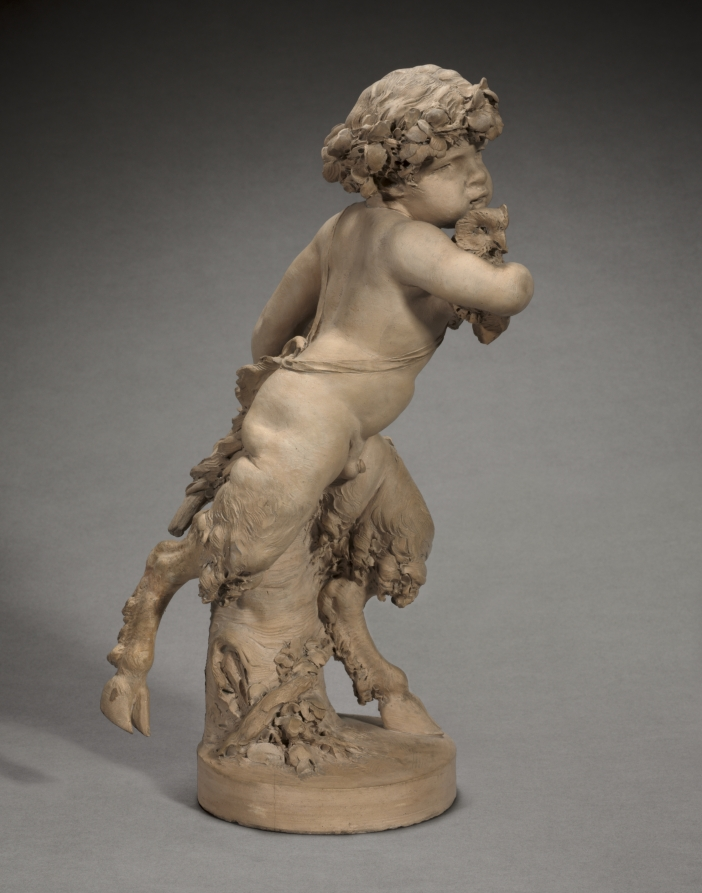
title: Young Satyr Running with an Owl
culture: France, 18th century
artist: Clodion (French, 1738–1814)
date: 1770s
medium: terracotta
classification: Sculpture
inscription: signature incised on back: CLODION.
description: These works by French sculptor Claude Michel, known as Clodion (1738–1814), shows a pair of young satyrs. Clodion was fond of depicting characters from classical antiquity in his work, and the subject of child or baby satyrs in Bacchanalian celebrations appear often in the work of Rococo artists. The female satyr wraps a plump arm around a nest filled with baby birds, while her male counterpart holds an owl. Balancing on one foot, the two flee the scene of their theft.